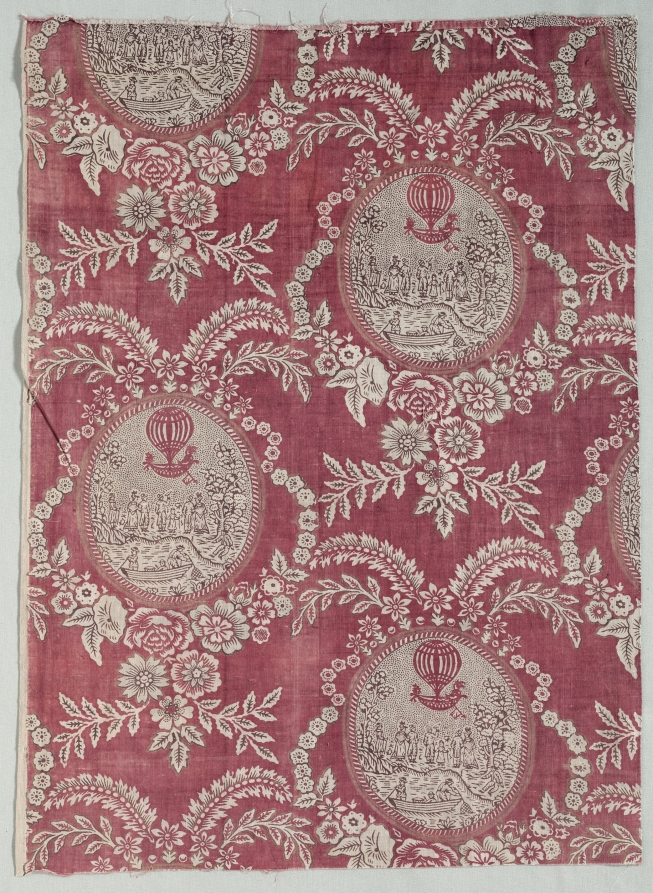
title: Fragment of Woodblock Printed Cotton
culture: France, Alsace, late 18th century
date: c. 1785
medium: woodblock print on cotton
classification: Textile